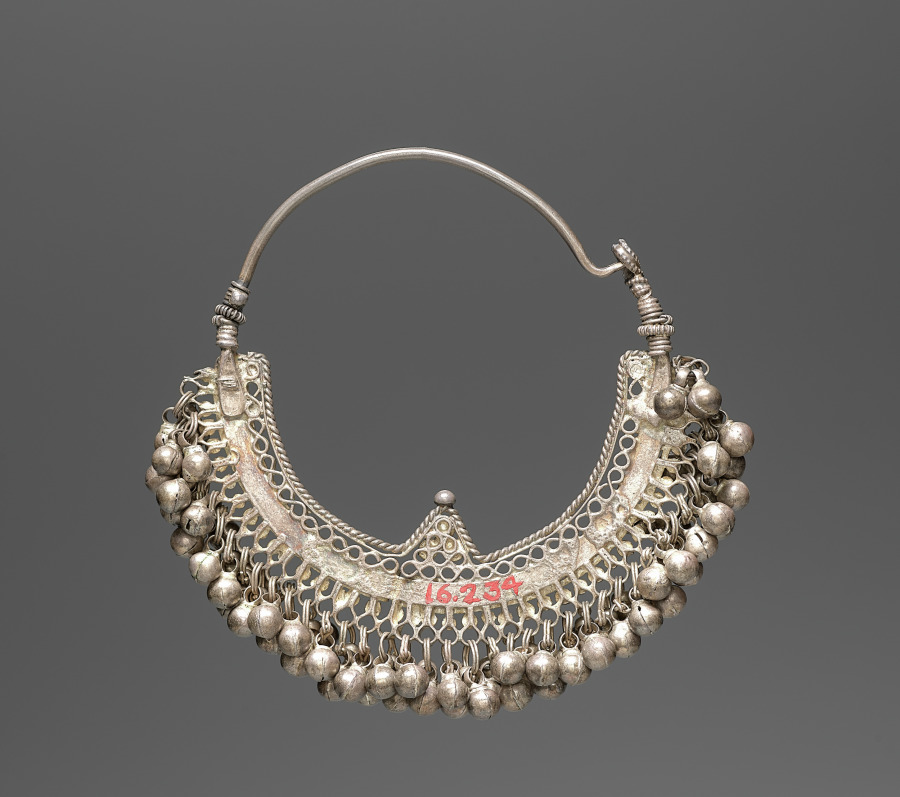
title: Nose Ring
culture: India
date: early 1900s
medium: silver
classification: Jewelry